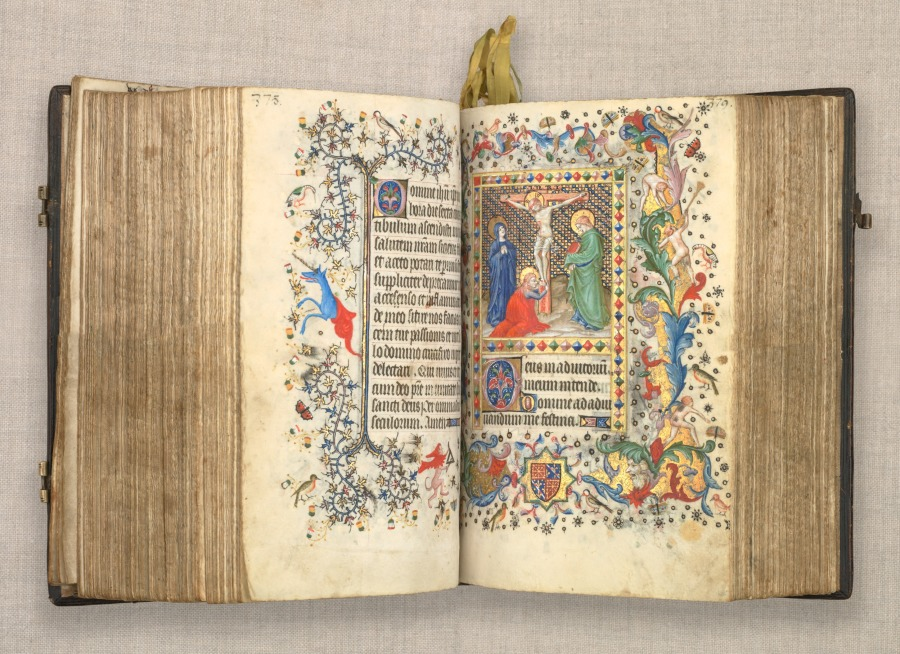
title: Hours of Charles the Noble, King of Navarre (1361-1425): fol. 184v, Text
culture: France, Paris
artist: Master of the Brussels Initials and Associates (French)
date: c. 1405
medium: ink, tempera, and gold on vellum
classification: Bound Volume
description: This precious volume was obviously highly prized by its owner, the French-born King of Navarre, who had his coat of arms painted on no less than twenty folios. Rather than directly commissioning this manuscript from a specific workshop, it seems that Charles the Noble acquired his book of hours -- perhaps ready-made for the luxury market -- while on a trip to Paris in 1404-05. A collaborative effort, six painting styles are evidenced within the pages of this codex, those of two Italians, two Frenchmen, and two Netherlanders. The painter who was responsible for the planning and decoration of the book, and who produced seventeen of the large miniatures, was a Bolognese artist known as the Master of the Brussels Initials. His principal assistant, responsible for most of the borders, was a Florentine who signed his name "Zecho" da Firenze on folio 208 verso.